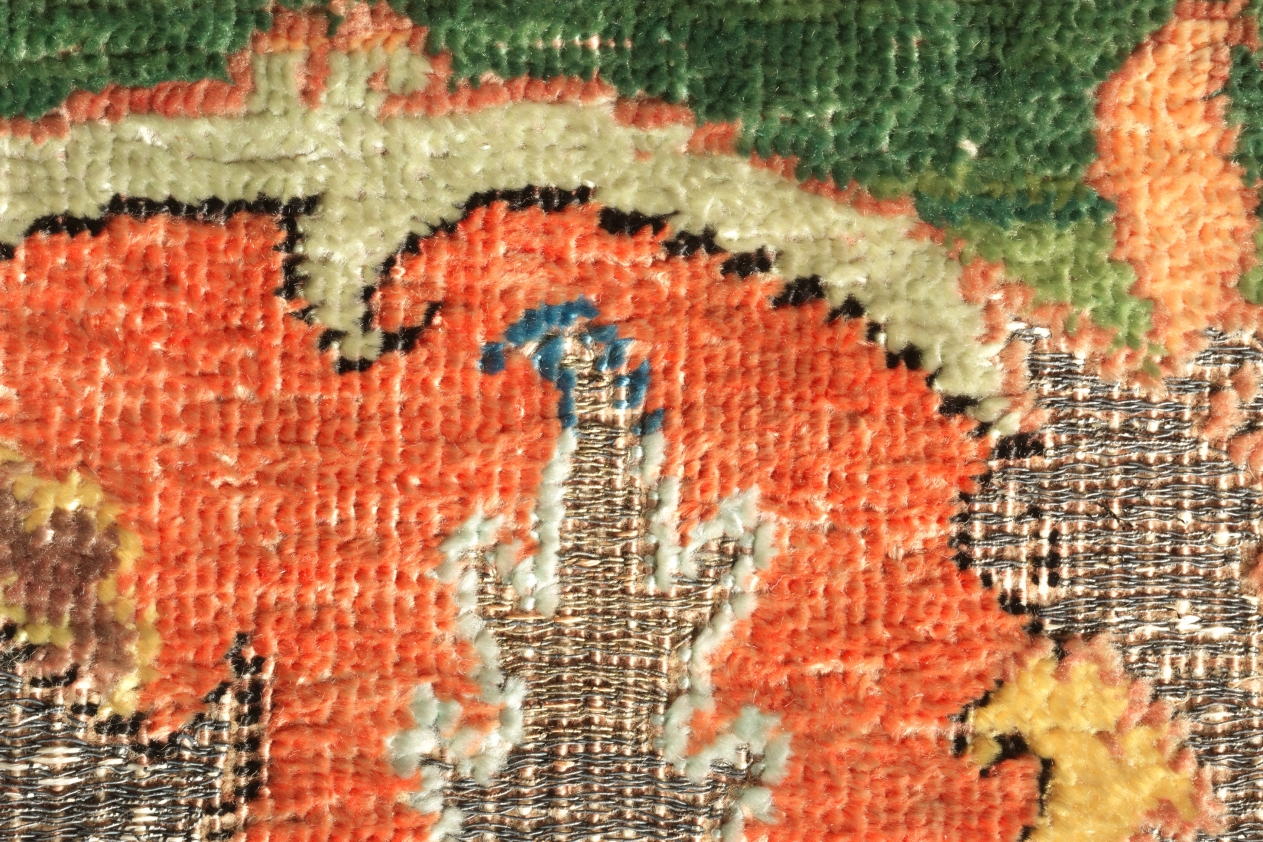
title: Royal Carpet with Silk and Metal Thread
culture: Iran, Isfahan, Safavid period (1501-1722)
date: 1600–1625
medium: Cotton: warp; cotton and silk: wefts; silk: pile, asymmetrical knot; gilt- and silver-metal thread: brocaded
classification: Carpet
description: The Safavid dynasty was the greatest dynasty from Iran in the Islamic period. Similarly, woven textiles and carpets from this period are some of the best produced in the region. Royal workshops produced luxurious textiles, like this one, to furnish the royal court. Expertly woven silks were highly prized by the Iranian elite but were also produced for export to the European aristocracy.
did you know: 16th- and 17th-century Iranian carpets with silk and metal thread were mistakenly called "Polish," based on one displayed in the Polish exhibit at the Paris World Fair in 1878.